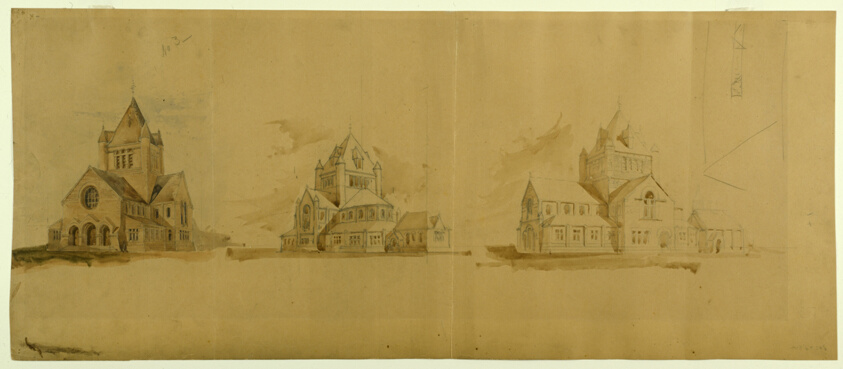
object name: Architectural Drawing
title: Saint Gabriel's Church, Chicago, Illinois, Perspective Sketches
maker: Burnham and Root (American, 1873-1891); John Wellborn Root (American, 1850-1891)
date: c. 1889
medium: Graphite and watercolor on paper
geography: United States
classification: design drawing; architectural drawing; architecture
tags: Chicago